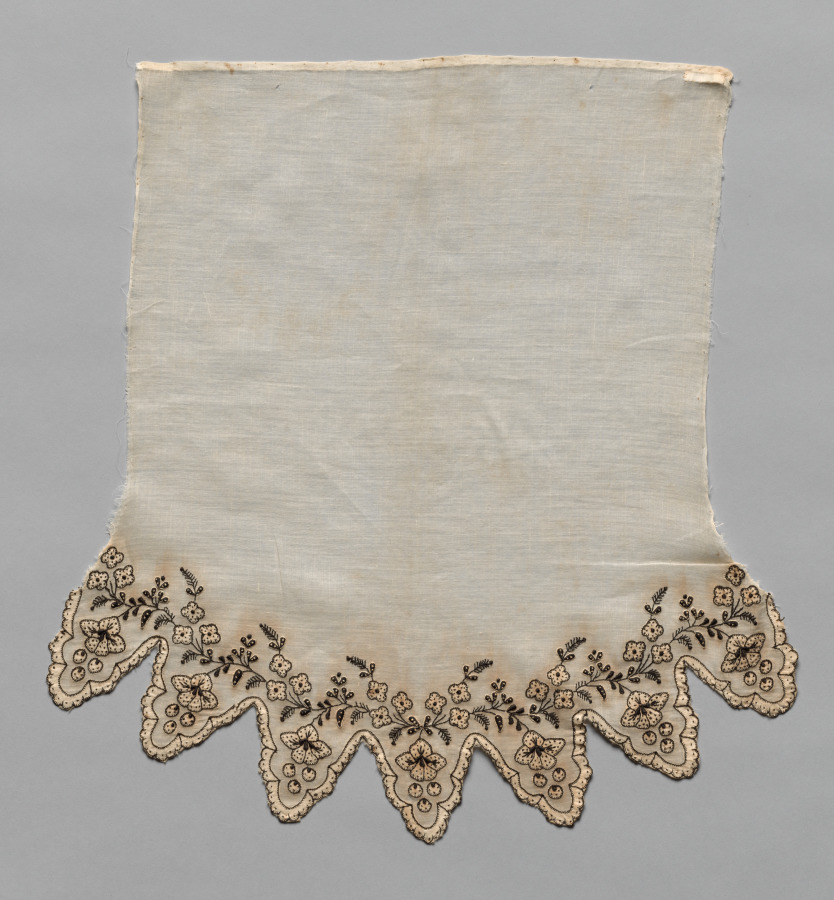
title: Sleeve (one of two)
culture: America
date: 1800s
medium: Plain weave cotton with appliqué and embroidery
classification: Embroidery